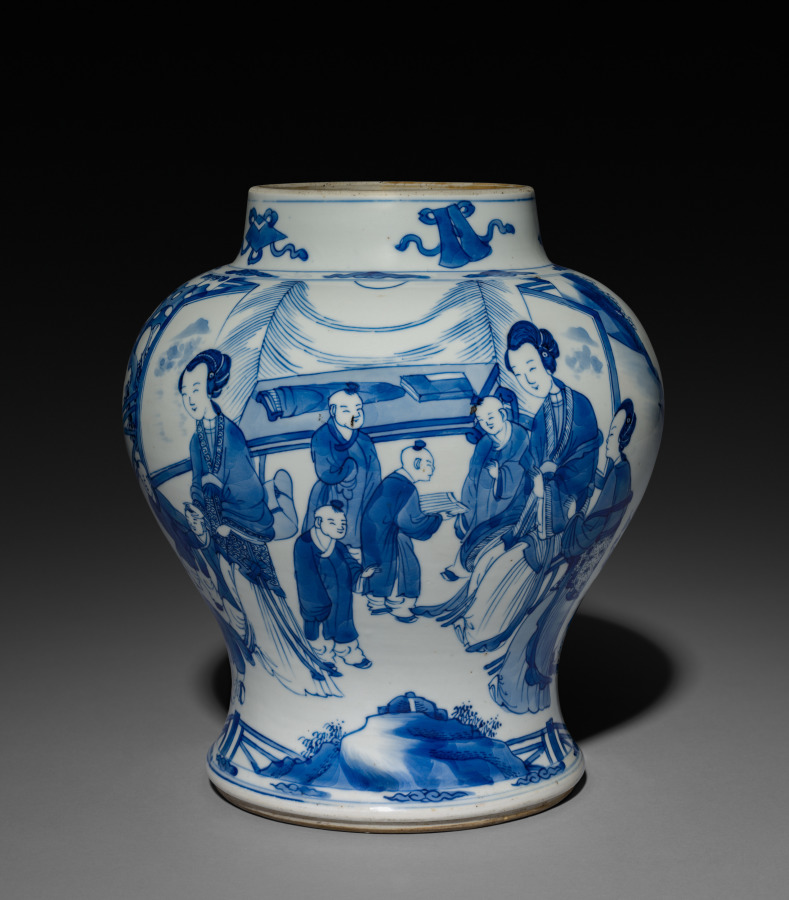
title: Vase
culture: China, Qing dynasty (1644–1911), Qianlong reign (1736–95)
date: 1736–95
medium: porcelain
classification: Ceramic